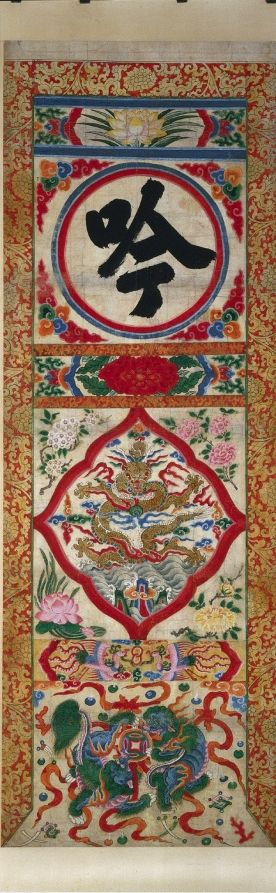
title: Painted Panel of Character "Recite"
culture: Korea, Joseon dynasty (1392–1910)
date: early 1900s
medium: hanging scroll, ink and color on paper; unmounted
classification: Painting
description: This set of four colorful hanging scrolls may have been used in an outdoor Buddhist ritual to evoke heavenly blessings. Each hanging scroll bears four different character; tiger, dragon, whistle, and recite. Traditionally, tiger and dragon belong to the four directional guards, respectively west and east.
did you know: This set of four colorful hanging scrolls may have been used in an outdoor Buddhist ritual to evoke heavenly blessings.